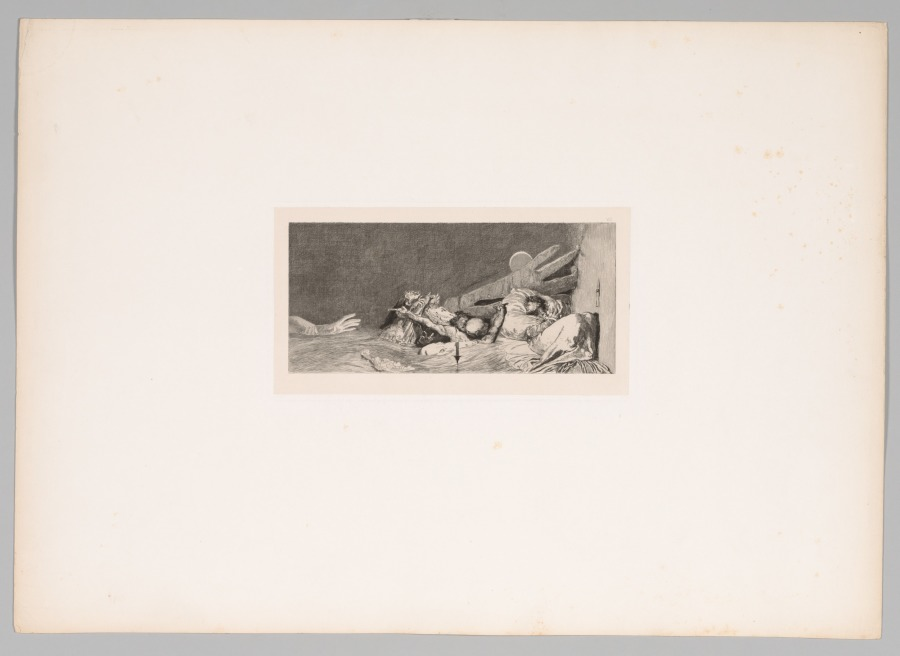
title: A Glove: Anxieties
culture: Germany, 19th century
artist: Max Klinger (German, 1857–1920)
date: 1880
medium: etching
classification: Print